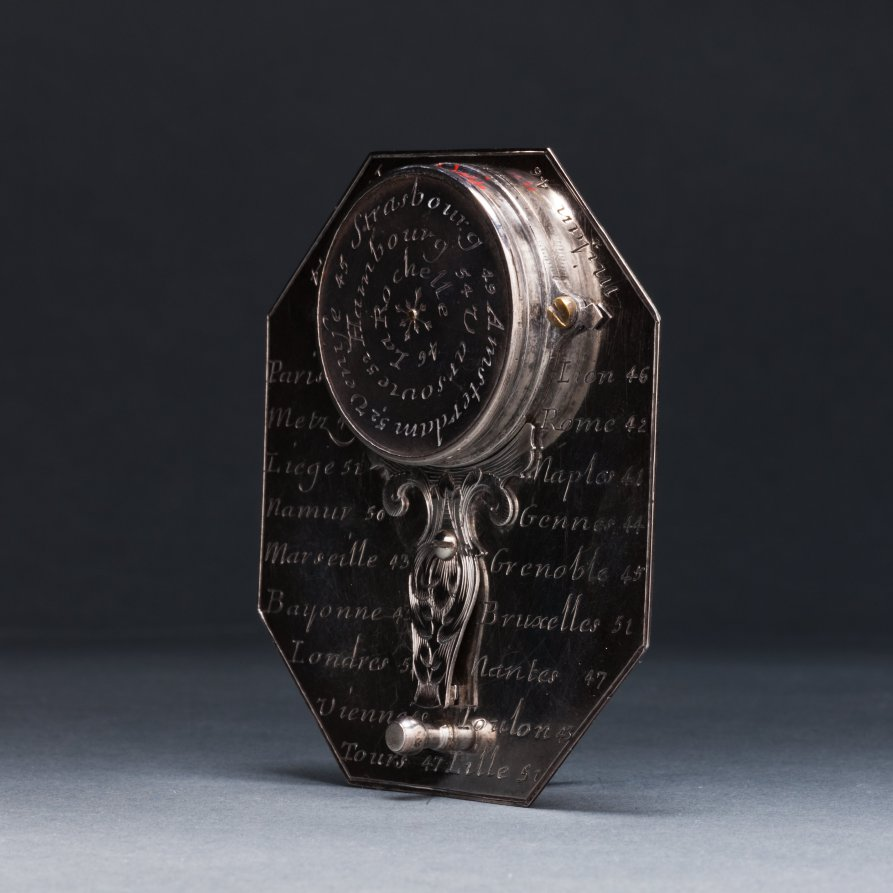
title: Butterfield Sundial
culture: France, 18th century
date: 1700s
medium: silver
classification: Silver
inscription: [Engraved signature above the compass in ribbon band]: "N. BION A Paris"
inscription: [Engraved on the face of the sundial]: “Pour 55° 4-5-6-7-8-9-10-11 50° IIII-V-VI-VII-VIII-IX-X-XI 45° 5-6-7-8-9-10-11 40° -VI-VII-VIII-IX-X-XI'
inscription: [Engraved on the other side]: "Pour 55° -8-7-6-5-4-3-2-1-0 50°-VIII-VII-VI-V-IIII-III-II-I 45°-8-7-6-5-4-3-2-1 40°-VII-VI-V-IIII-III-II-I"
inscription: [Engraved around the compass]: “NORD-OUEST-SUD-EST”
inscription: [Engraved on the back of the sundial]: “Turin 44 Milan 46 Paris 49 Lion 46 Metz 49 Rome 42 Liege 51 Naples 44 Namur 50 Gennes 44 Marseille 43 Grenoble 45 Bayonne 43 Bruxelle 51 Londres 52 Nantes 47 Vienne 48 Toulon 43 Tours 47 Lille 51”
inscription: [Engraved around the back of the compass]: “Venise 45 Strasbourg 49 Amsterdam 52 Hambourg 54 Varsovie 52 La Rochelle 46”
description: Butterfield-type sundials are characterized by their adjustable gnomons, metal flaps that cast a shadow on the dial’s face to indicate the hour, and geographical indices. This sundial has a scale adjustable between latitudes of 40° to 60° north. The latitudes of 26 European towns are engraved on its back for quick reference. With an intricately engraved silver face, it would have functioned as a fashionable traveler’s accessory.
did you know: Butterfield-style sundials were named after Micheal Butterfield, an English scientific and mathematical instrument maker who worked in Paris between 1674 and 1724.